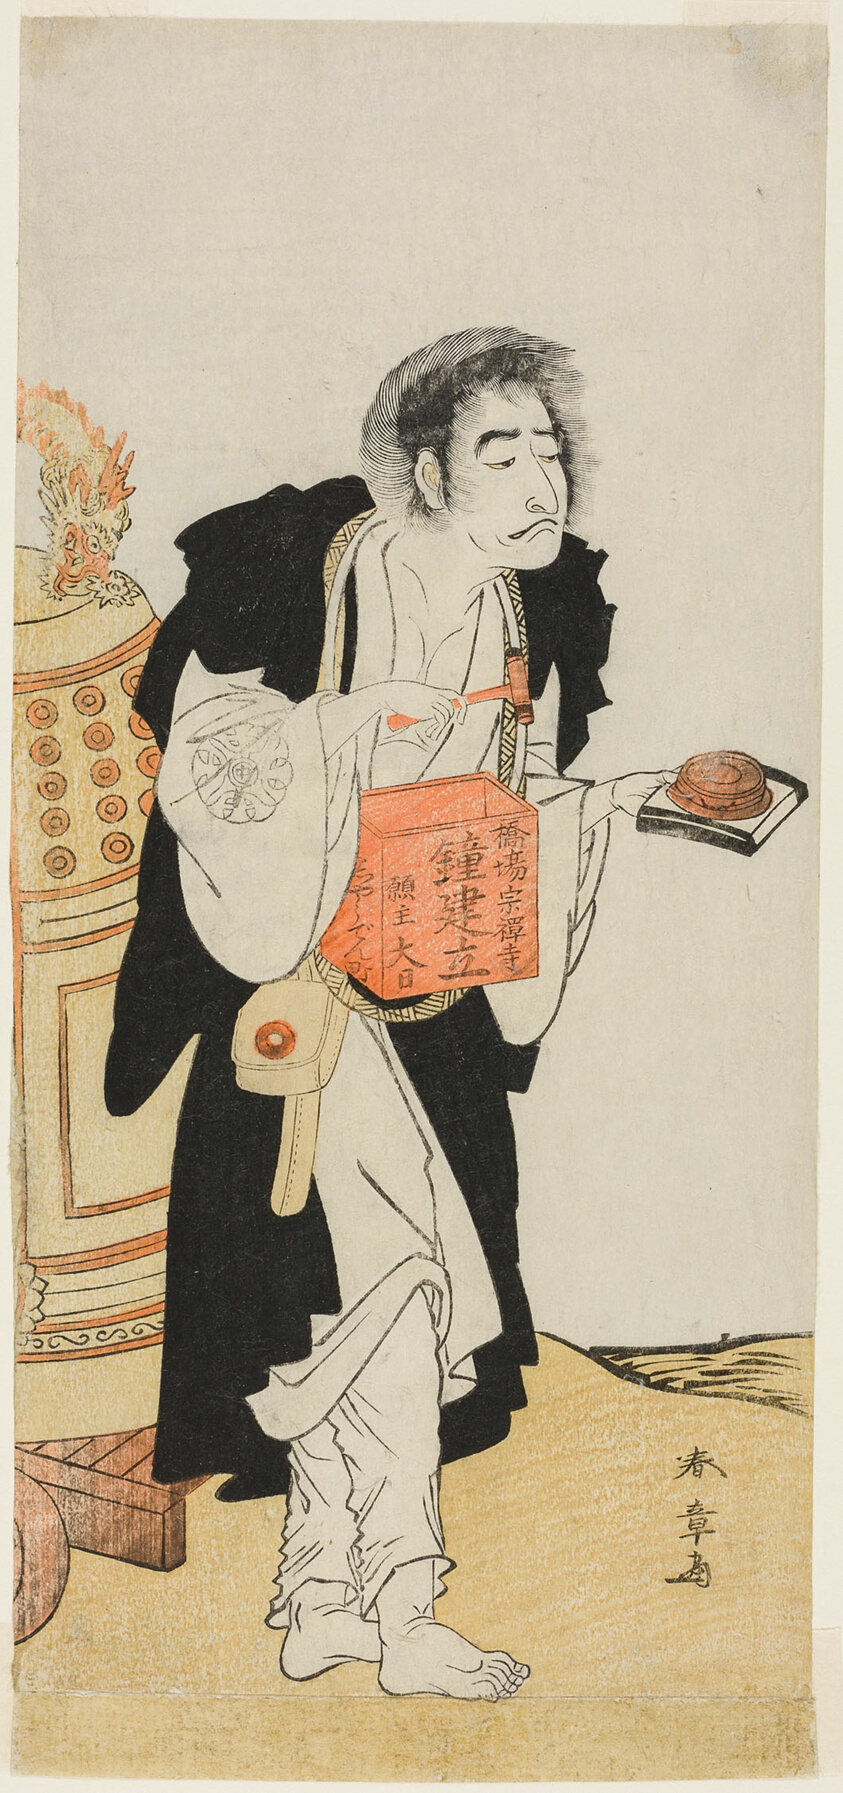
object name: Print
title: The Actor Nakamura Nakazo I as the Renegade Monk Dainichibo Soliciting Alms, in the Play Edo Meisho Midori Soga (Famous Places in Edo: A Green Soga), Performed at the Morita Theater from the Fifteenth Day of the First Month, 1779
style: Japanese (culture or style)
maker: Katsukawa Shunsho 勝川 春章; Japanese, 1726-1792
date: c. 1779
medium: Color woodblock print; hosoban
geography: Japan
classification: woodblock print; print; asian art